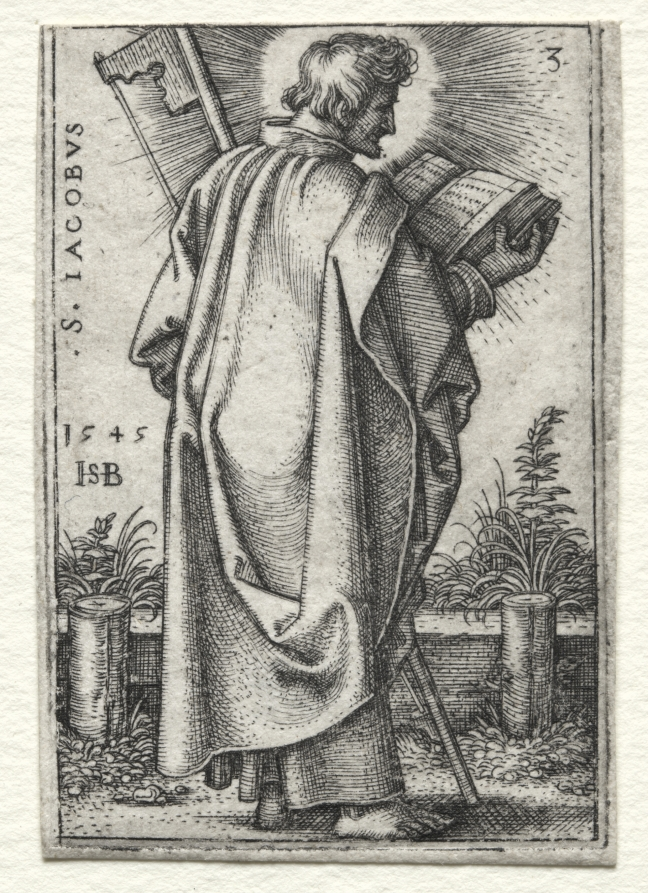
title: St. James the Less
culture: Germany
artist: Hans Sebald Beham (German, 1500–1550)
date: 1545–1546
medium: engraving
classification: Print